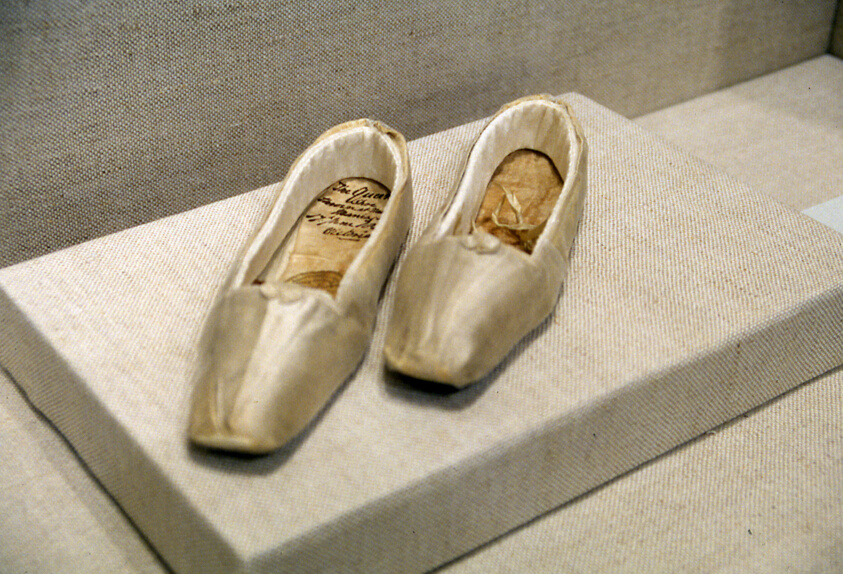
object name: Textile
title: Pair of Shoes (Formely Belonging to Queen Victoria 1819–1901)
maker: Designed by Gundry & Sons (English, active c. 1850); England, London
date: c.1850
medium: Leather and silk, satin weave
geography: London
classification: textile; shoes - weaving; costume accessory - shoe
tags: queens, royal personages, royalty